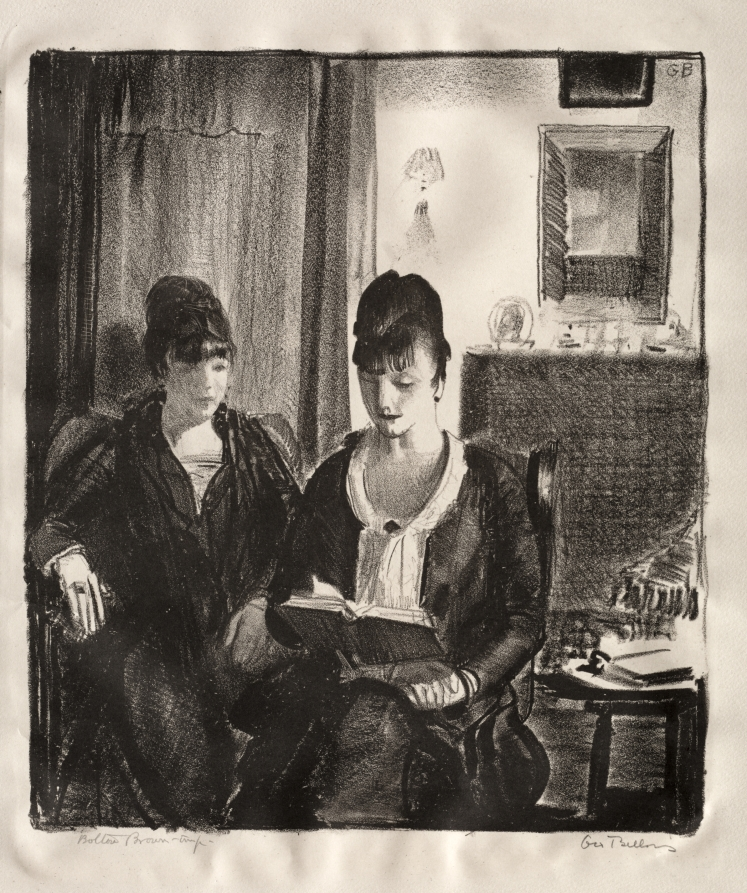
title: Elsie Reading to Emma, Second Stone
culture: America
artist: George Bellows (American, 1882–1925)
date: 1921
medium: lithograph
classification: Print